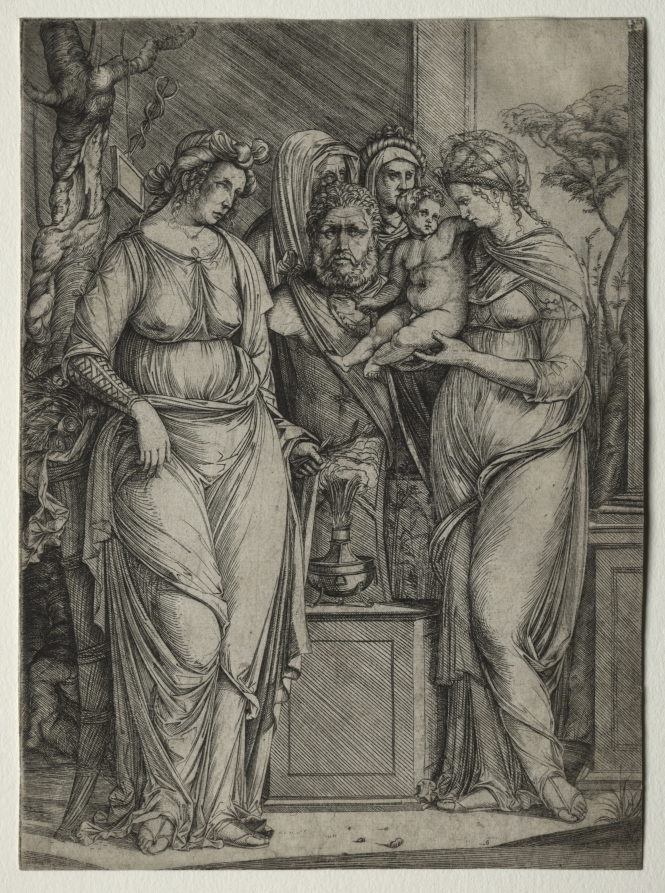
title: Sacrifice of Priapus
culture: Italy, 20th century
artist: Jacopo de' Barbari (Italian, c. 1460/70–c. 1516)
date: c. 1499–1501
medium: engraving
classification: Print